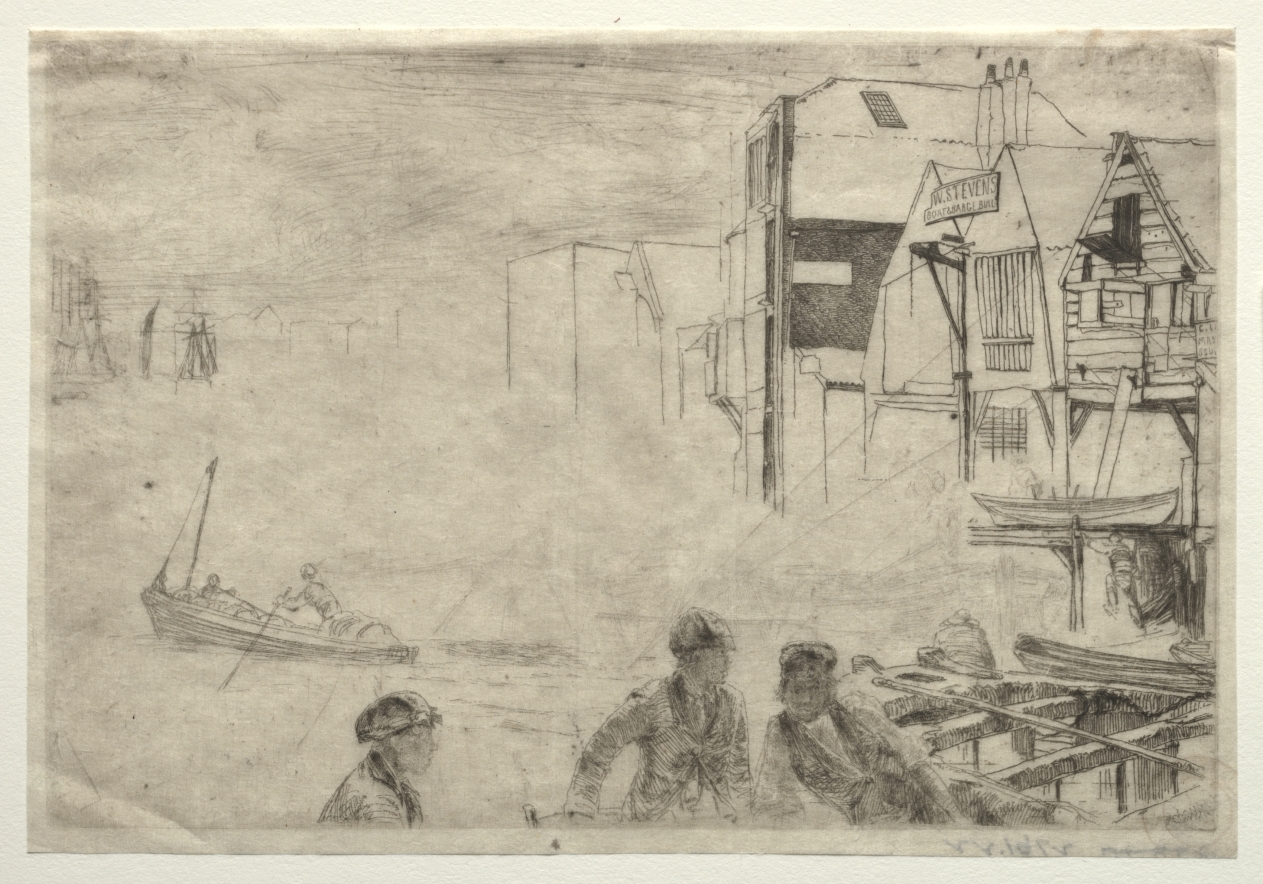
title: A Wharf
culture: America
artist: James McNeill Whistler (American, 1834–1903)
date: 1859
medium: etching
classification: Print